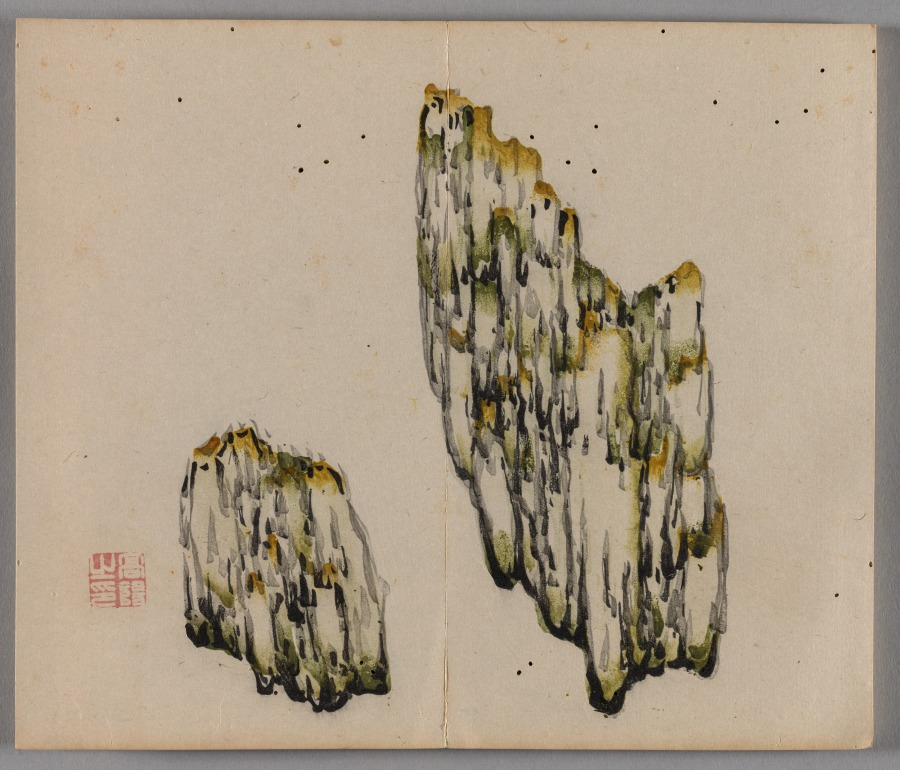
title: Ten Bamboo Studio Painting and Calligraphy Handbook (Shizhuzhai shuhua pu): Rocks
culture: China, Qing dynasty (1644-1911)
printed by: Hu Zhengyan (Chinese, c. 1584–1674)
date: 1633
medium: Woodblock-printed book; ink and colors on paper; first edition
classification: Print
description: Color printing reached a level of perfection in the early 1600s, as seen in this Ten Bamboo Studio Collection of Calligraphy and Painting and the Mustard Seed Garden Manual of Painting (printed 1679 and 1701). The painterly quality, precision in registering (aligning) the woodblocks, and harmonious colors made them the most successful color print editions in Chinese history. Both editions were printed and compiled in Nanjing, spread nationwide, and had a great impact on the arts in Japan and Korea.